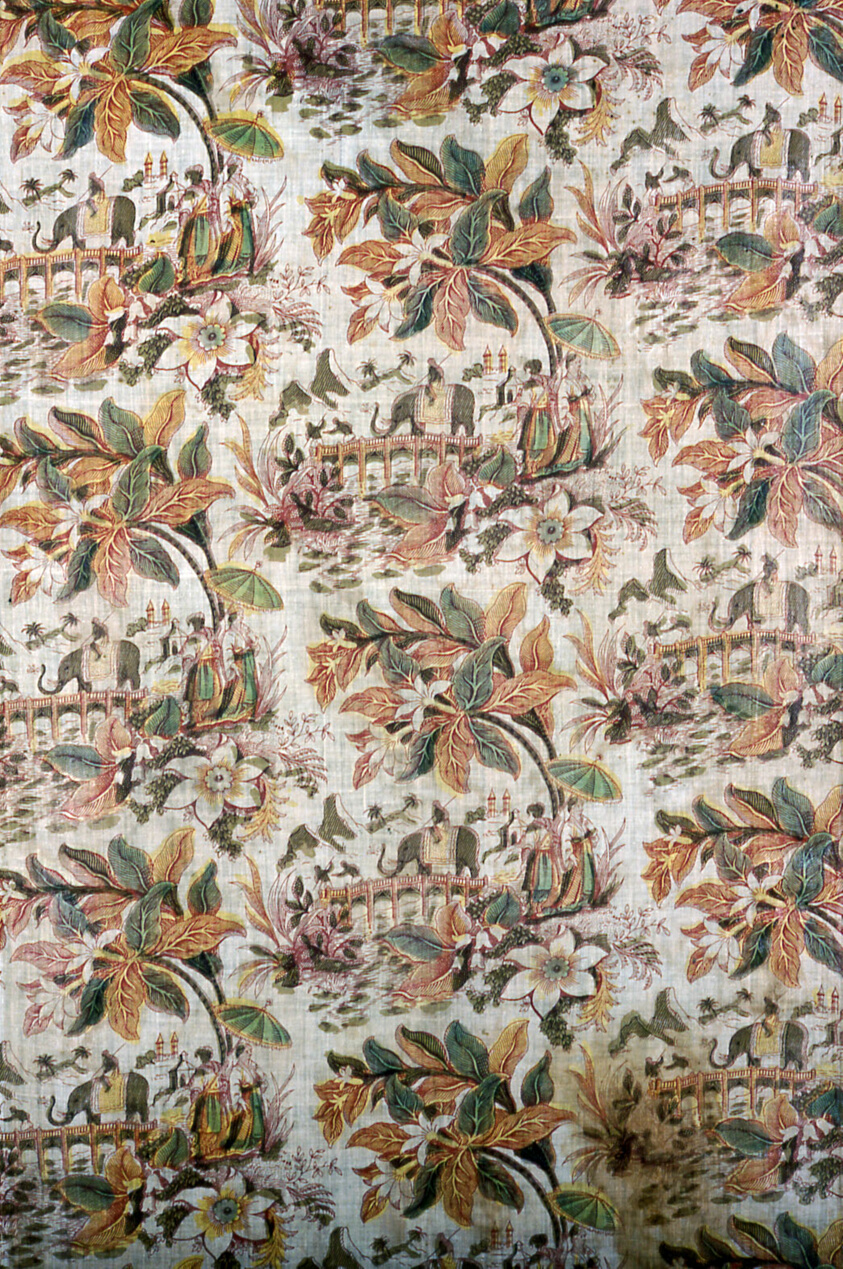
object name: Textile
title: Panel (Furnishing Fabric)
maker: England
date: c. 1825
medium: Cotton, plain weave; roller printed, glazed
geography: England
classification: textile; weaving - printed; furnishing textile